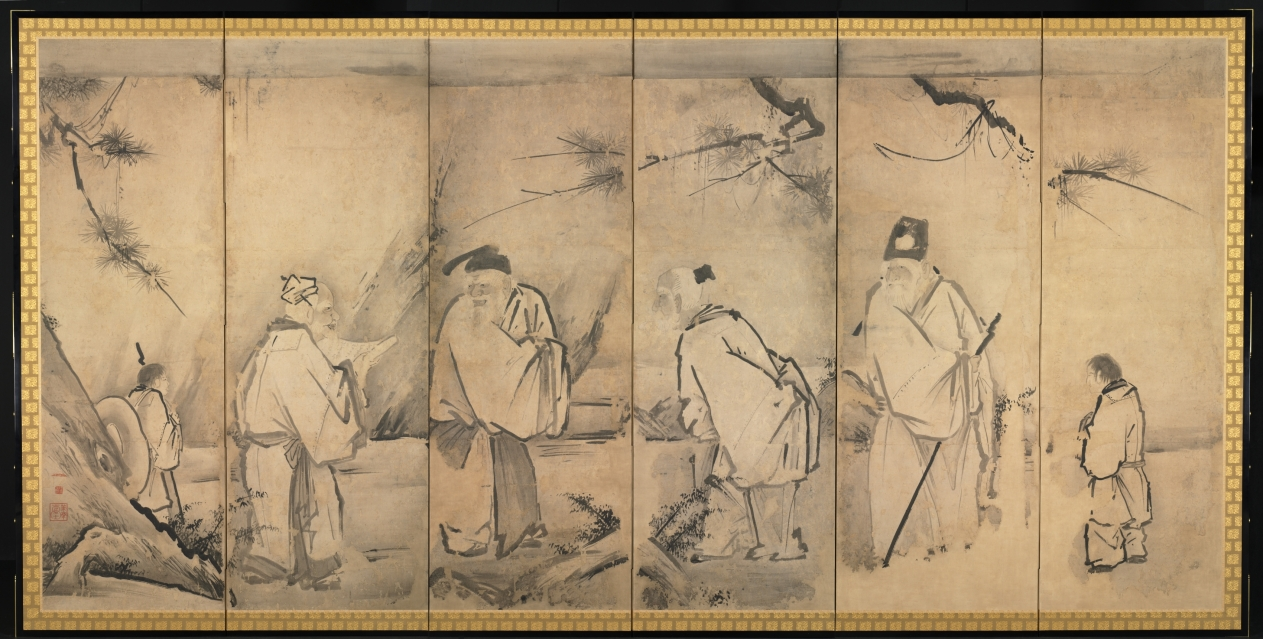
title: Four Elders of Mt. Shang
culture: Japan, Edo period (1615–1868)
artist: Kano Tan’yū (Japanese, 1602–1674)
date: 1600s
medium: pair of six-fold screens; ink on paper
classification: Painting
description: The Kano school was a group of professional artists patronized by the shogun from the late Muromachi period to the Edo period. The group adopted themes of reclusiveness to convey the importance of loyalty to the shogunate. A leader of the Edo Kano school, Kano Tanyu paired Seven Sages of the Bamboo Grove and Four Elders of Mt. Shang to reference a painting of the same theme attributed to Kano Motonobu. Seven Sages of the Bamboo Grove refers to the elites who escaped the social chaos of China’s Wei-Jin period (AD 200s–400s); they fled to a secluded bamboo grove where they could express themselves freely, enjoying pure conversation, music, and wine. The other screen, Four Elders of Mt. Shang, depicts the scholars who left the turbulence of the late Qin dynasty to pursue their scholarly interests in seclusion on Mt. Shang in Shanxi province.